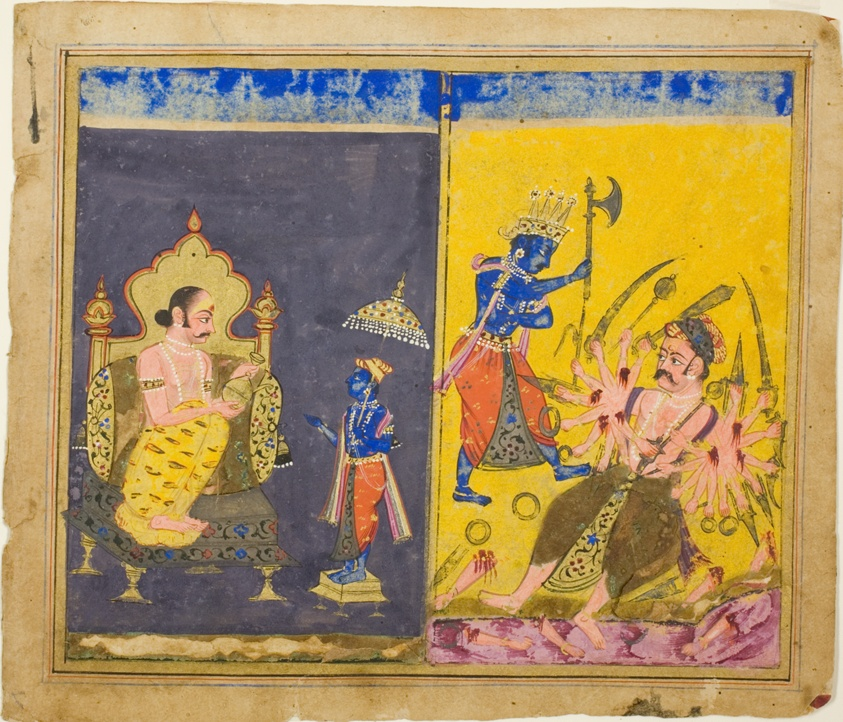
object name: Painting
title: Krishna's Fifth and Sixth Avatars, page from a copy of the Gitagovinda of Jayaveda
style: South Asian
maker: India; Probably Deccan, Aurangabad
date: Late 17th century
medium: Opaque watercolor and gold on paper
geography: Deccan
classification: miniature painting; painting; asian art